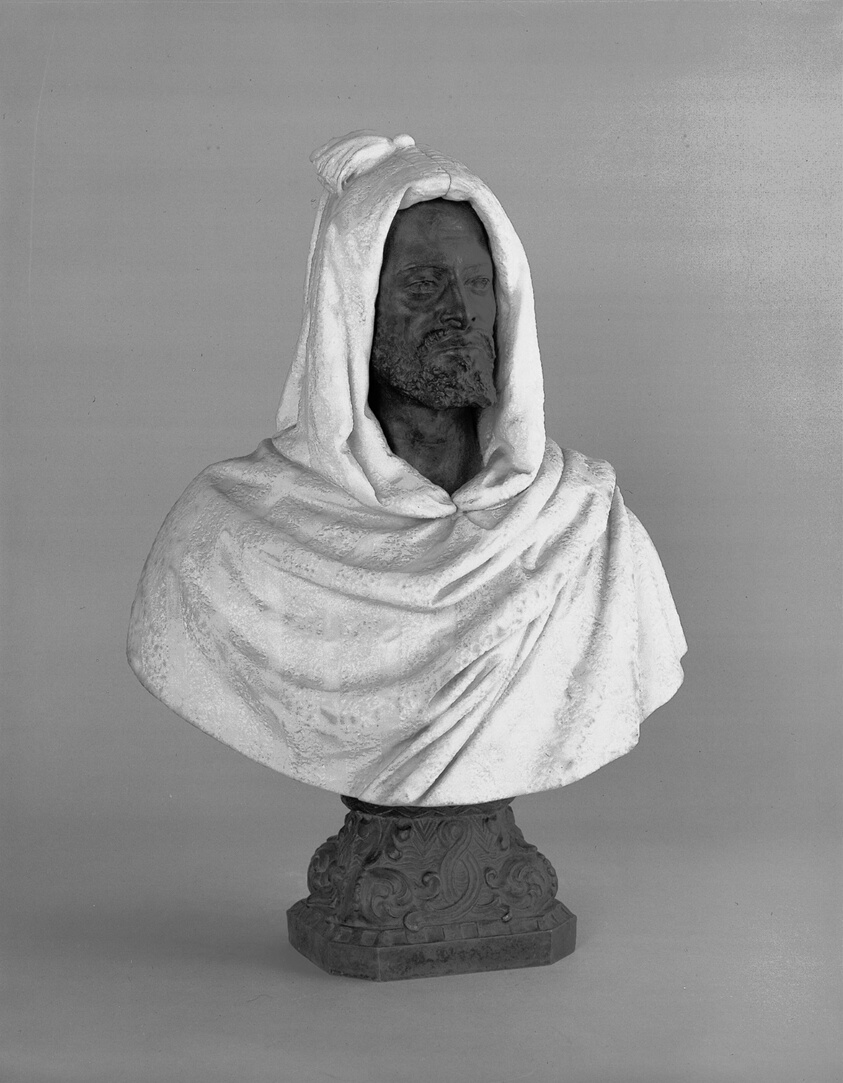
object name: Sculpture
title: Bust of a Man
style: nineteenth century, 19th century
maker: Pietro Calvi (Italian, 1833–1884)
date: c. 1875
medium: Marble and bronze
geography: Italy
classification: bust/head; Italian; sculpture